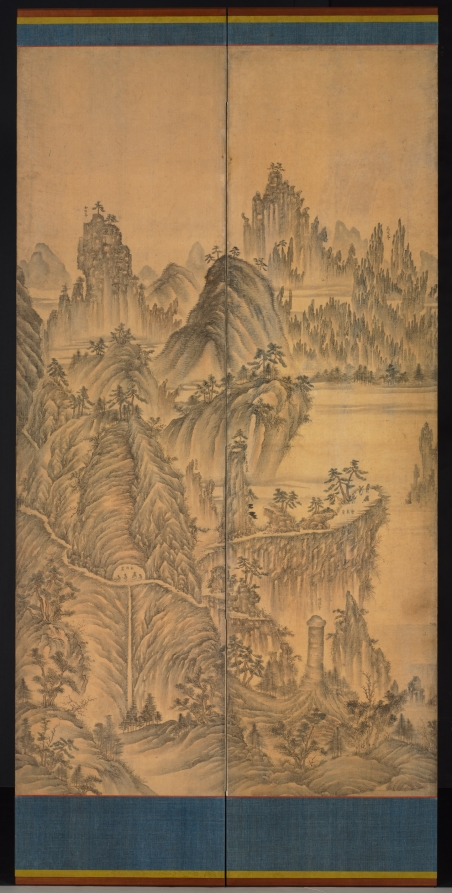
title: Seven Jeweled Mountain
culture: Korea, Joseon dynasty (1392–1910)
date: late 1800s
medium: ten-panel screen; ink and color on silk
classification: Painting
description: With a bird’s-eye view, this ten-panel folding screen portrays the famous Seven Jeweled Mountain 칠보산 in North Korea. Ancient volcanic eruptions shaped the mountain’s unique and awe-inspiring terrain such as phallic-shaped pillars (panel #5, from the right); a large flat-topped, steep-sided cliff (panels #7 and #8), and a rugged mountain composed of metamorphic and igneous rocks (panels #9 and #10). The tradition of landscape painting that details actual natural sites and captures their topographic features in Korea began in the 1700s and continued onward. While such natural wonders were beloved as popular destinations for tourism and pilgrimage, after the Korean War (1950–53), these sites in North Korea are no longer accessible to the outside world. This folding screen detailing the mountain’s distinctive topography feeds our imagination and longing for such an unattainable place.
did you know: Featuring a spectacular panoramic view and topographical details, this ten-panel folding screen is an excellent 19th-century version of the Korean “true-view” landscape painting tradition.